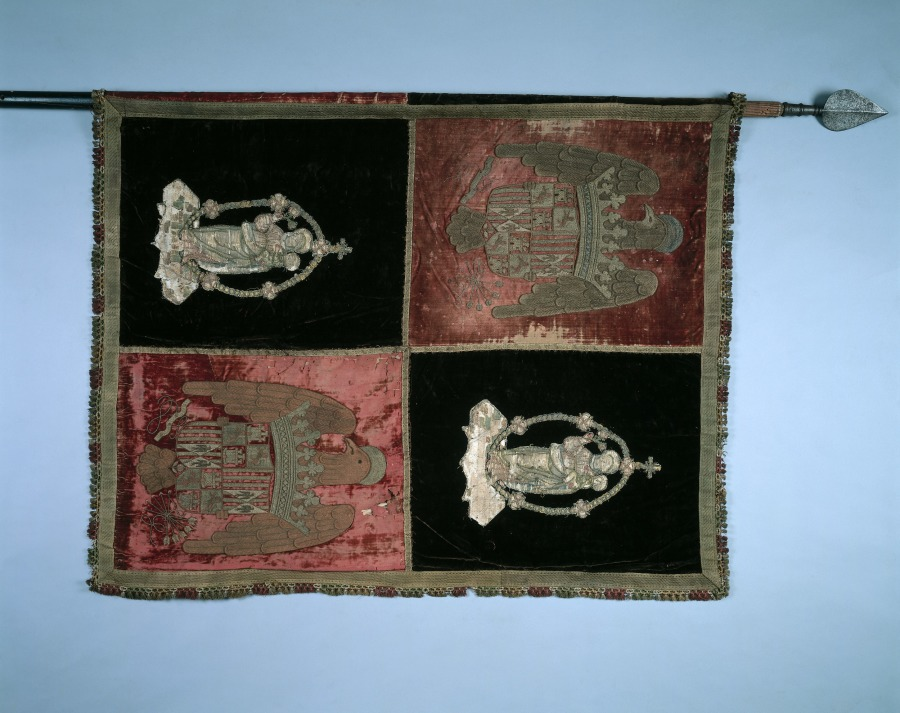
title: Banner with a Quartered Royal Arms of Spain and the Madonna and Child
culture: Spain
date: 1500s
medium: red and dark brown velvet, embroidered; fringe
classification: Velvet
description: This banner is quartered or broken into four parts. Two sections contain embroidered images of the Virgin and Child. The other two are devoted to the royal arms of Spain. On the arms are representations of the kingdoms of Spain in the 1500s. A three towered-castle represents the Kingdom of Castille; the rearing lion is a symbol for the Kingdom of León; two eagles stand for the Kingdom of Sicily; and at the bottom is the pomegranate for Granada. Below this appear a yoke and a bundle of arrows which have been seen on Spain's coat of arms since the union of Ferdinand II of Aragon and Isabella I of Castile.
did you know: This banner was hanging in the armor court when it first opened in 1916.